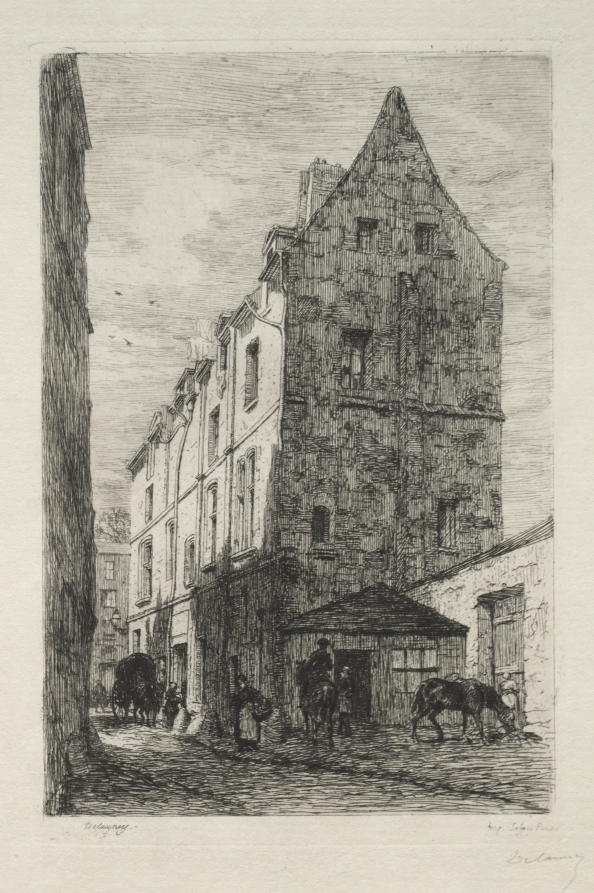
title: Maison dite de la Reine Blanche, Rue de Marmousets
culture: France, 19th century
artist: Alfred Alexandre Delauney (French, 1830–1894)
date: c. 1870–94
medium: etching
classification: Print